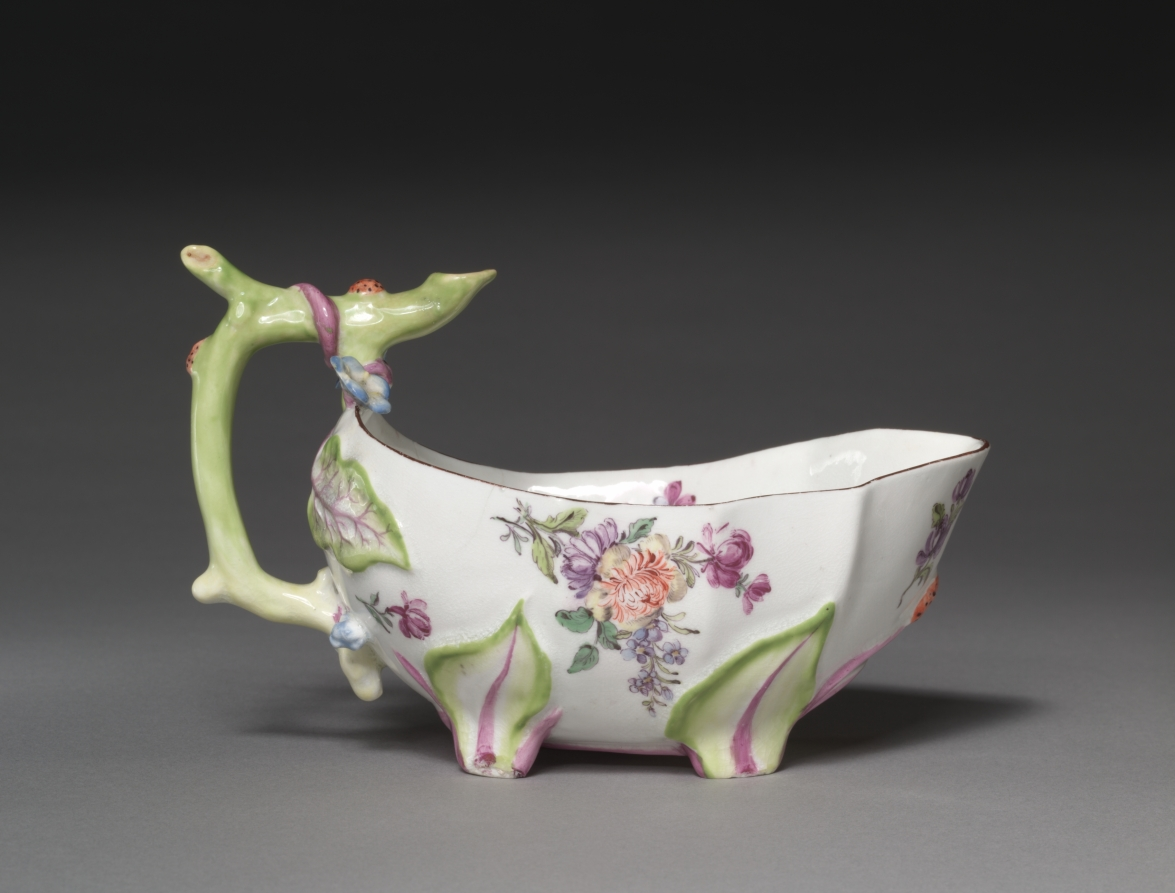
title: Sauceboat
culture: England, Chelsea, 18th century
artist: Chelsea Porcelain Factory (Britain, London, 1745–84)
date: c. 1755–1756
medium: porcelain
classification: Ceramic